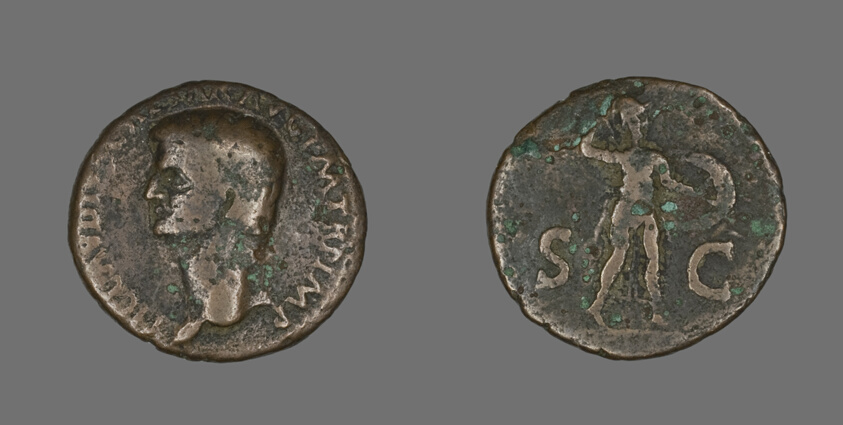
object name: Coin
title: As (Coin) Portraying Emperor Claudius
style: imperial (roman), ancient, roman (ancient, style or period)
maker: Roman, minted in Rome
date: 41-54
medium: Bronze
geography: Rome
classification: coin; ancient art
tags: goddesses